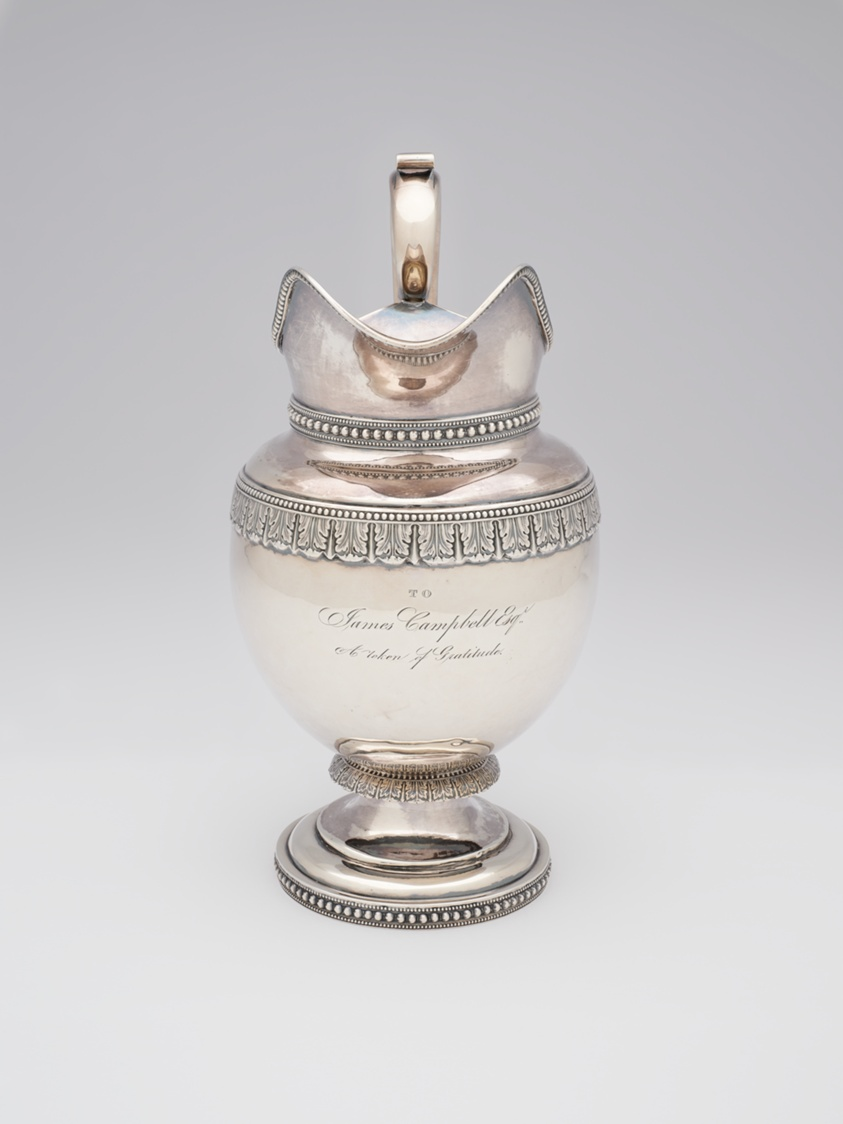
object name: Metalwork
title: Pitcher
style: 19th century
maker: Retailed by Baldwin Gardiner (American, 1791–1869); New York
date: 1827–48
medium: Silver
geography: New York City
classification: pitcher (vessel); silver; decorative arts